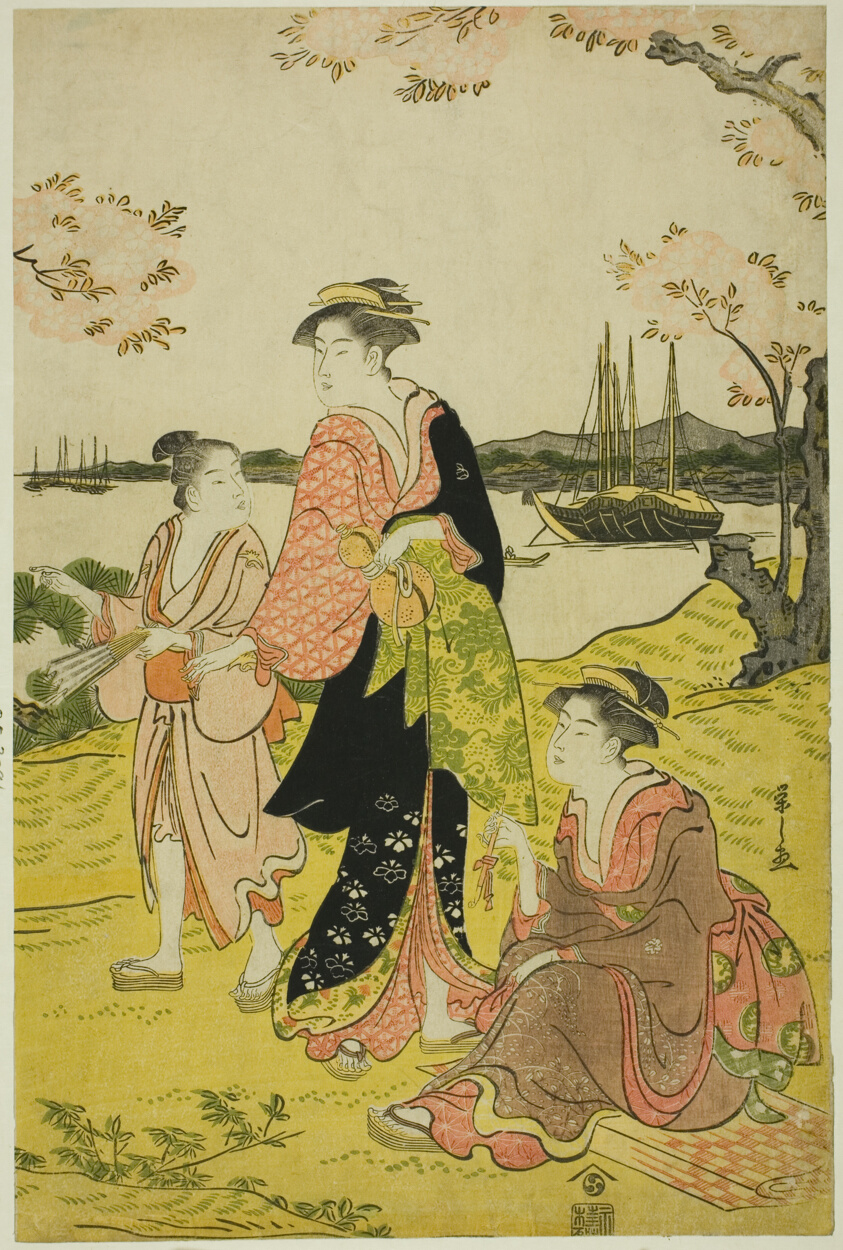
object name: Print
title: Viewing Cherry Blossoms at Goten Hill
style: Japanese (culture or style)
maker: Chobunsai Eishi; Japanese, 1756-1829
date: c. 1787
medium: Color woodblock print; right sheet of oban triptych (left sheet: 1939.2195, keyblock proof impression: 1925.3090)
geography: Japan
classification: woodblock print; print; asian art